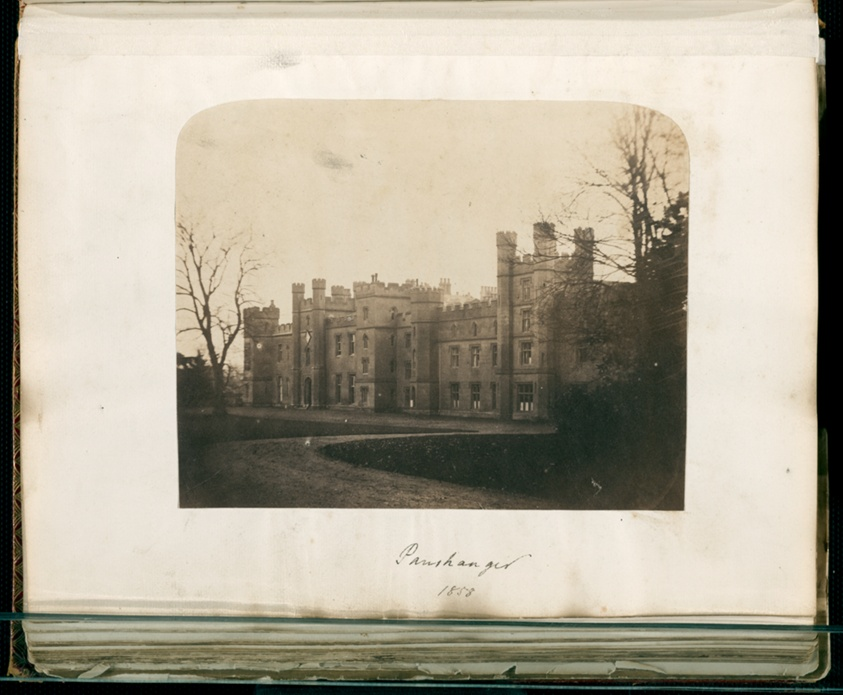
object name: Photograph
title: Untitled (Panshanger)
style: 19th century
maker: Artist unknown; English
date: 1858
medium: Albumen print, from the "Untitled Album"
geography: England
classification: photograph; albumen silver print; photography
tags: Collected by Hugh Edwards